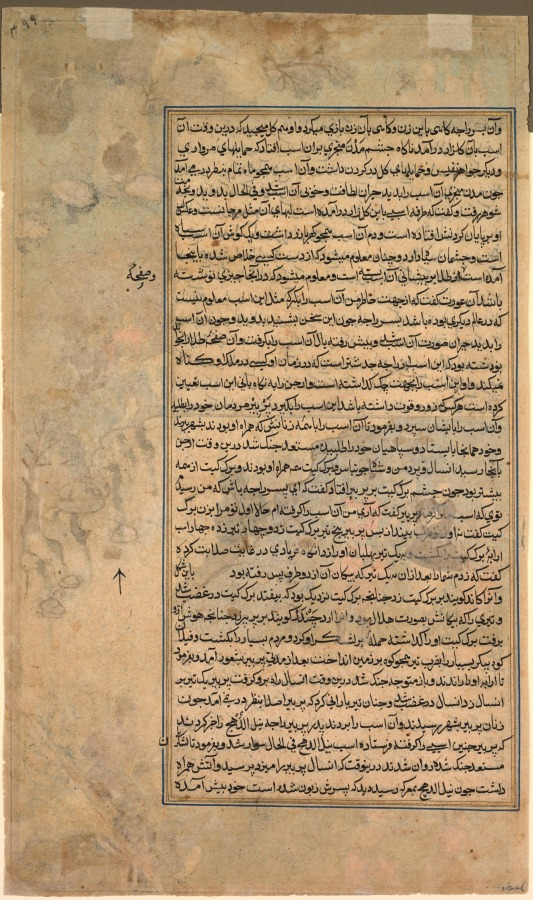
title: The First Adventure of the White Horse, Page from the Khan Khanan's Razm Nama (Book of Wars)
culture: India, Subimperial Mughal school, 17th century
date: c. 1610–17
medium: Gum tempera, ink, and gold on paper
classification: Painting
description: After the five Pandava brothers defeated their cousins, the oldest, who became king, performed an ancient Vedic ritual known as the horse sacrifice in order to determine the physical extent of his rule. For one year a horse wanders freely around the country, attended by warriors, and every land through which the horse passes becomes part of the king’s territory. The warriors go to battle with any local resistance. In this case, the warrior following the horse is Arjuna, one of the five Pandava brothers. He has encountered the son-in-law of the god of fire, Agni, who creates a river of fire to block the warriors. In a dramatic composition set on the banks of the swirling golden river of fire, running diagonally down the page between multicolored rocky outcrops, Arjuna, dark-skinned and crowned, pleads with Agni, the god of fire. He prays that the horse be allowed to pass, saying that the horse sacrifice is in accordance with sacred Vedic injunctions, and that at the end of the year, the horse will be sacrificed to him, the god of fire himself.